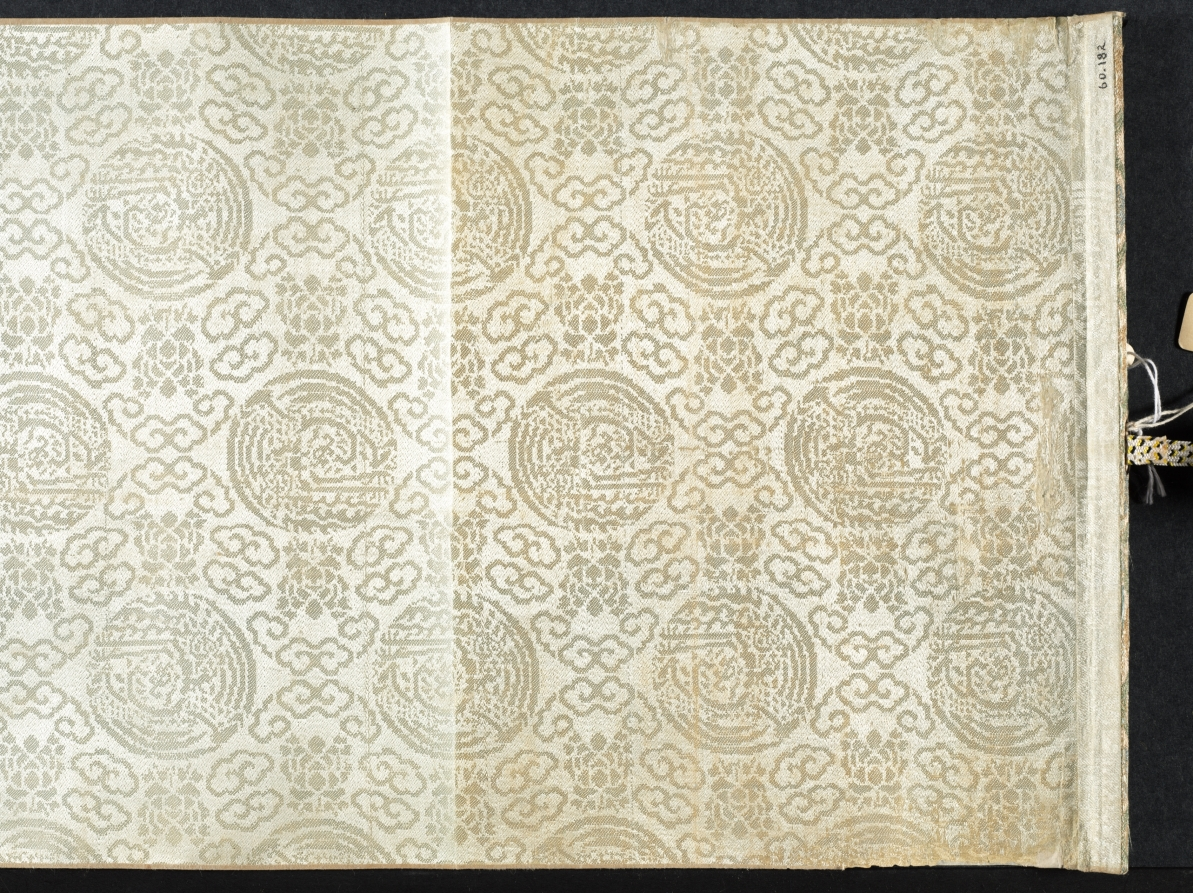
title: Dream Journey among Rivers and Mountains, no. 90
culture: China, Qing dynasty (1644-1911)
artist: Cheng Zhengkui (Chinese, 1604–1676)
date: 1658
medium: Handscroll; ink and color on paper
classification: Painting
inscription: 江山臥遊圖其九十, 青溪道人, 戊戌夏五。 [印] 程正揆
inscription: Title and inscription by Huang Yi 黃易 (1744–1802), and 3 seals.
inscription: 1 colophon and 9 additional seals: 3 seals of Dai Zhi 戴植 (active about 1821–1850); 1 colophon, dated 1914, and 3 seals of Yan Shiqing 顏世清 (1873–1929); 3 seals of Wang Nanping 王南屏 (1924–1985).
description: Cliffs and waterfalls interspersed with trees and dotted vegetation are spread over this handscroll. Long paths wind their way through villages, beside cottages, shrines, and over bridges. In the past, Chinese literati officials liked to take a “dream journey” along mountains and rivers when viewing landscape paintings in their studios. Scenery of this kind thus became a way to escape from the world of bureaucracy and administration. The painter Cheng Zhengkui used the title “Dream Journey” for a whole series of paintings, of which this is number 90. He is said to have painted 500 of them, but the actual count remains unknown.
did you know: Cheng Zhengkui planned to make 100 dream journey paintings but may have ultimately made 500.